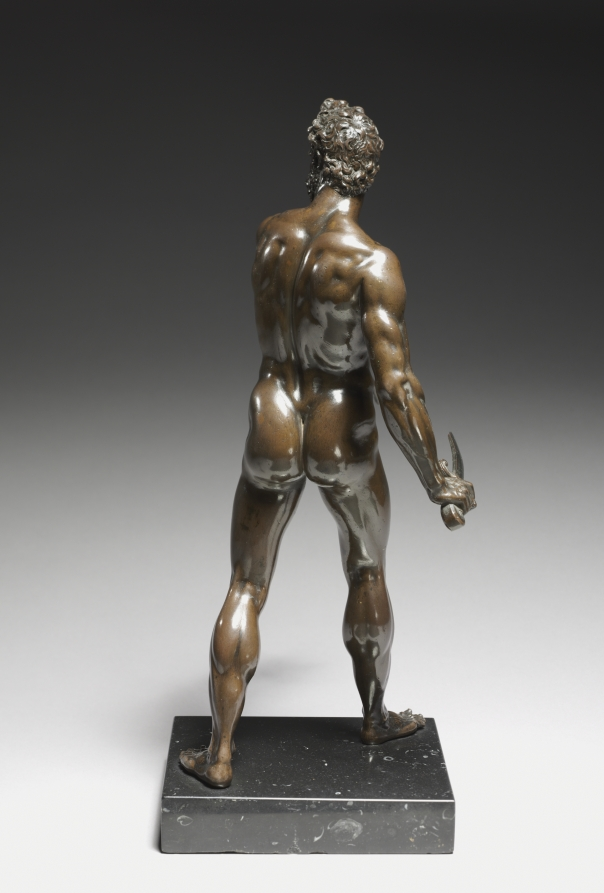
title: Mars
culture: Italy, 16th century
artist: Giambologna (Flemish, active Italy, 1529–1608)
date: c. 1584–87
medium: bronze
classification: Sculpture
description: Although he is lacking the helmet and armor common to Mars in Roman iconography, this figure is identified as the ancient god of war. Mars pauses mid-stride, swinging his sword arm back to strike an enemy in his gaze; this dynamic composition is typical of Giambologna’s models. Collectors prized small bronzes such as this and often kept them in special rooms along with antiquities, coins, shells, and other curiosities. Easy to hold and arrange due to their small size, they were appreciated through touch as well as sight.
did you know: The active, twisting pose indicates that the statue was designed to be viewed in the round.